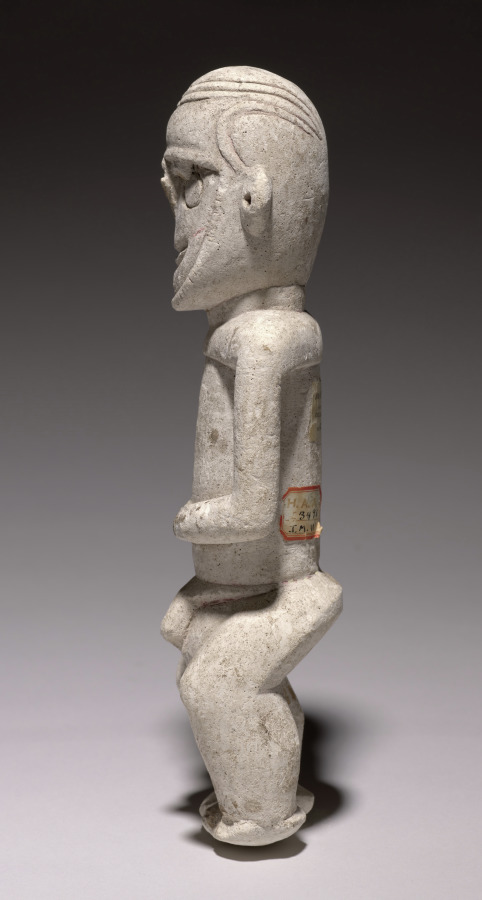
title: Male Ancestor Figure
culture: Melanesia, Central New Ireland, Namatani District, 20th century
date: before 1930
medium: limestone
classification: Sculpture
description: Carved and painted chalk figures from New Ireland served as repositories for the spirits of deceased men and women during funeral rituals. After the ceremony, the figures were destroyed or discarded, allowing the spirits to join their ancestors.